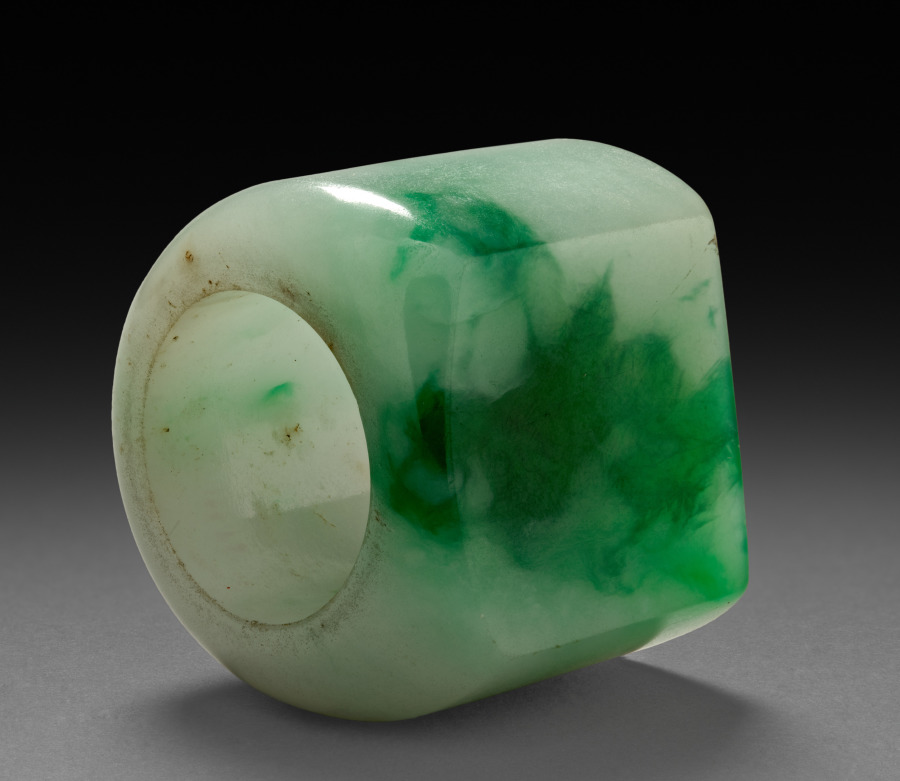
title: Thumb Ring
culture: China, Qing dynasty (1644-1911) or Republican period (1912-49)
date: 1800s–1900s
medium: green and white jade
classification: Jewelry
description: Jade rings were worn by men on the thumb of the right hand to assist with holding and pulling the string of the archer’s bow. However, thumb rings were also fashionable accessories for civil officials in the late Qing dynasty.